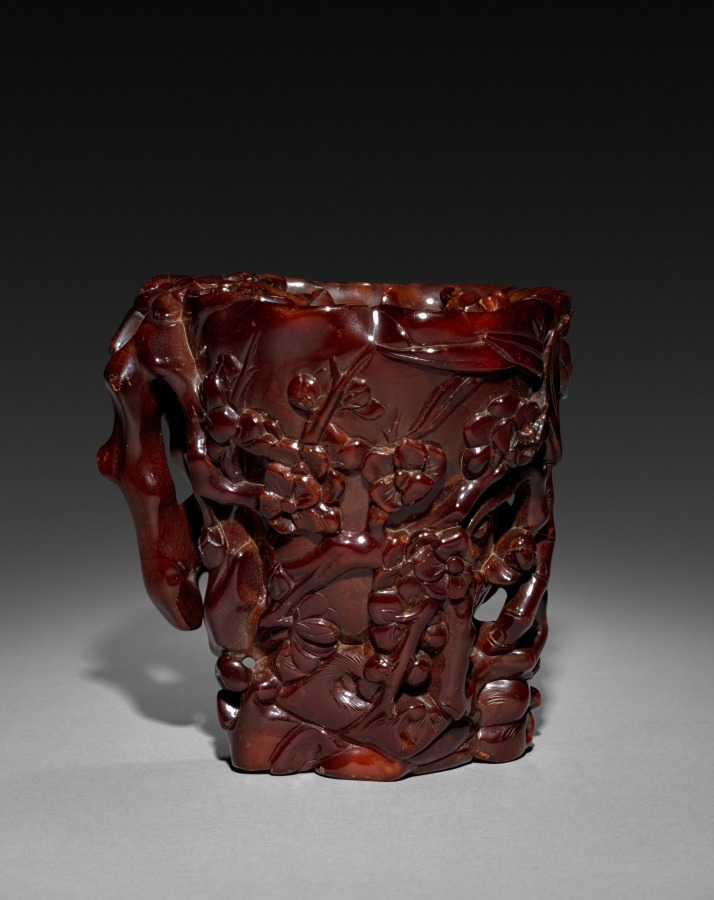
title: Cup with Prunus Blossoms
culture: China, Qing dynasty (1644-1911)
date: 1700s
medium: opaque mottled reddish-brown amber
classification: Stone